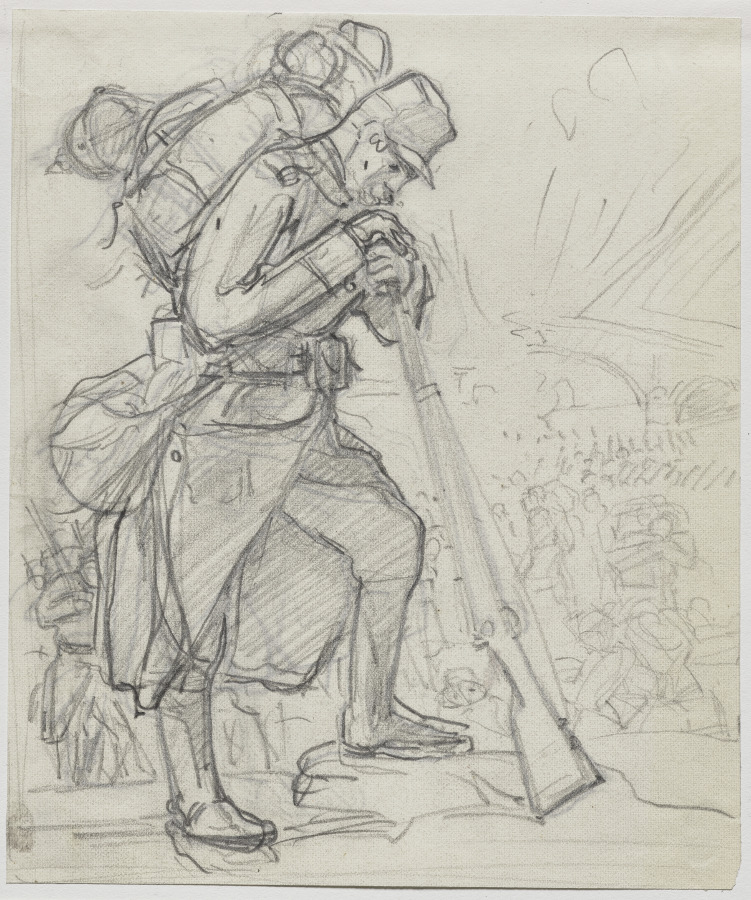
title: La Retraite après Charleroi...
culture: France, 20th century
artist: Auguste Louis Lepère (French, 1849–1918)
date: 1914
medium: pencil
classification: Drawing